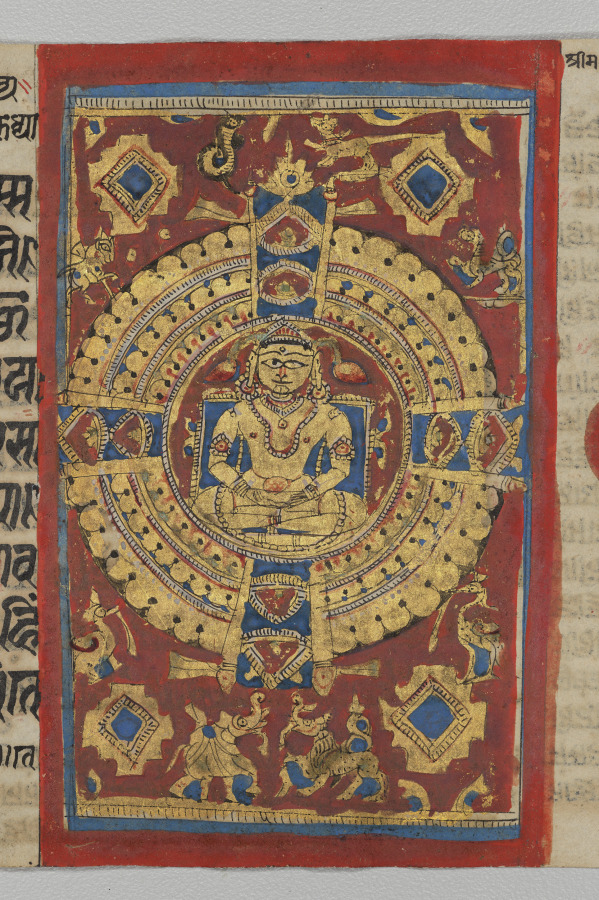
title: Mahavira's Omniscience and First Teaching (Samavasarana), Folio 39 (verso), from a Kalpa-sutra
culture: Western India, Gujarat, last quarter of the 15th century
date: c. 1475–1500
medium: Gum tempera, ink, and gold on paper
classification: Painting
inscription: [[upper right]] Śrī Ma* jñāna